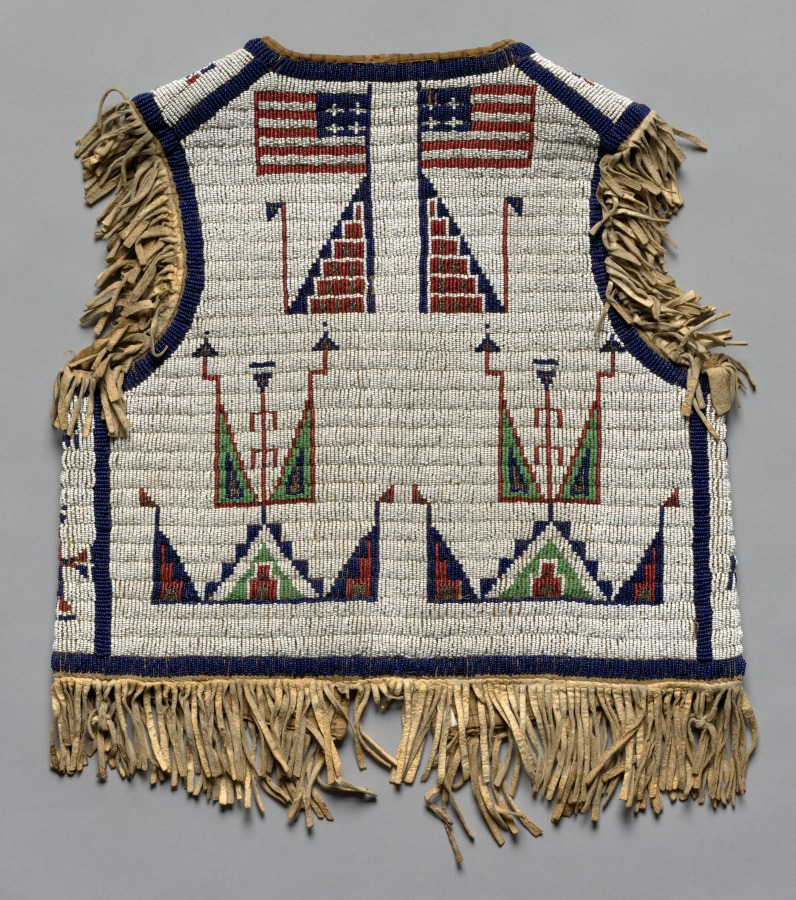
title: Boy's Vest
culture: Plains, Lakota (Sioux), 19th century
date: c. 1880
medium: beadwork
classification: Garment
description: For centuries, beautiful garments and objects have held great meaning for the native groups of the Great Plains. For instance, the Lakota (Sioux) ceremonially intone something sacred wears me. That is, humans don powerful garments but are worn, animated, and protected by the sacred forces within their materials and imagery. By 1700 European Americans began to make their presence felt in the region, and Plains people creatively adopted European materials and garment types into their wardrobes. By 1870 most Plains people had been forced onto reservations, and traditional life shattered—especially for men. The garments on display here all were made after that date.